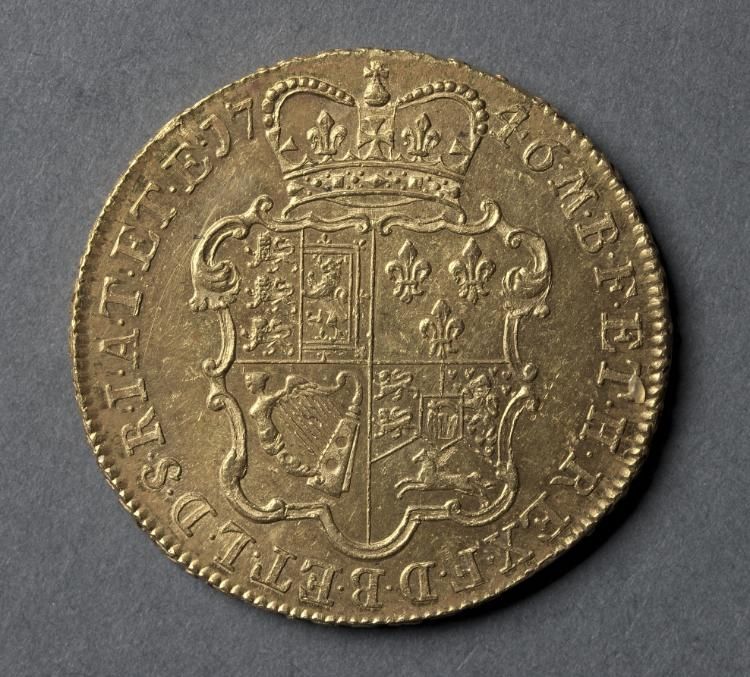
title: Five Guineas: Crowned and Garnished Shield of Arms (reverse)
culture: England, George II, 1727-1760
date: 1746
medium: gold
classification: Coins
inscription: M.B.F.ET.H.REX.F.D.B.ET.L.D.S.R.I.A.T.ET.E.1746.